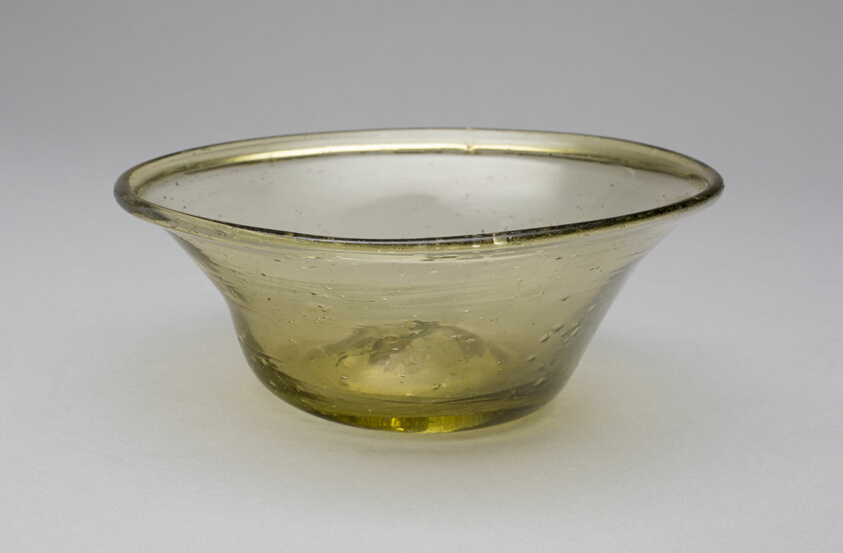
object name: Glass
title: Pan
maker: Artist unknown (American, 19th century); Possibly Kent, Ohio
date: c. 1825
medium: Blown glass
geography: Ohio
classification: container; glass; american decorative arts; american arts; decorative arts